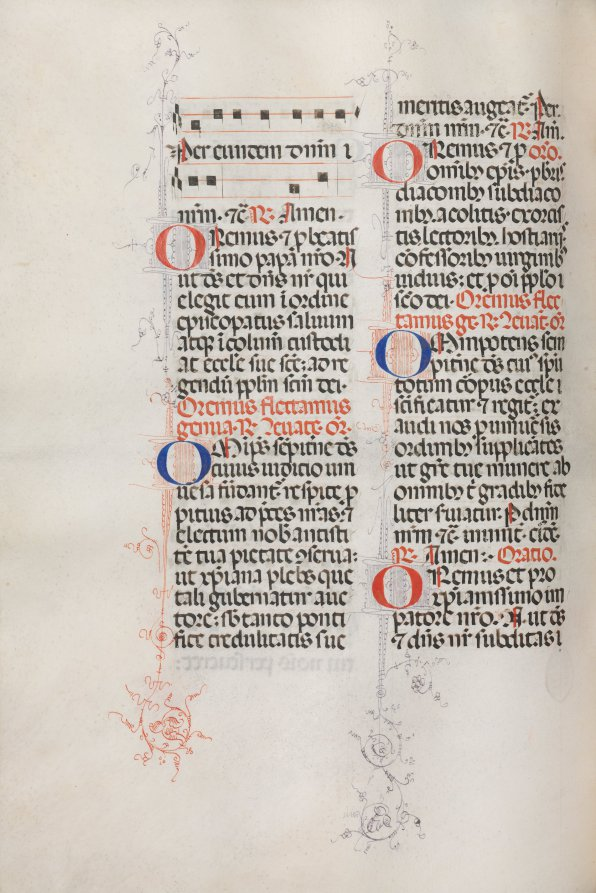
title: Missale: Fol. 146v: Music for various prayers "Oremus dilectissimi..." and "Omnipotens sempiterne Deus"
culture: Italy, Perugia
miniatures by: Bartolommeo Caporali (Italian, c. 1420–1503)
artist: assisted by Giapeco Caporali (Italian, d. 1478)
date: 1469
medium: ink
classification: Bound Volume